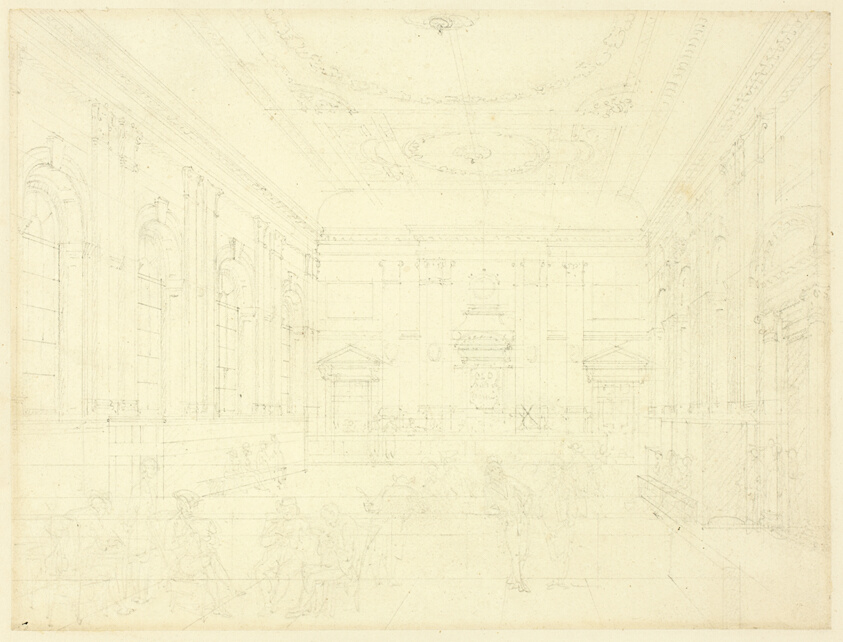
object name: Drawing and Watercolor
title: Study for South Sea House, Dividend Hall, from Microcosm of London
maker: Augustus Charles Pugin (English, born France, 1762-1832); Thomas Rowlandson (English, 1756-1827)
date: c. 1810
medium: Graphite on cream wove paper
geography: England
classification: graphite; drawings (visual works); prints and drawing